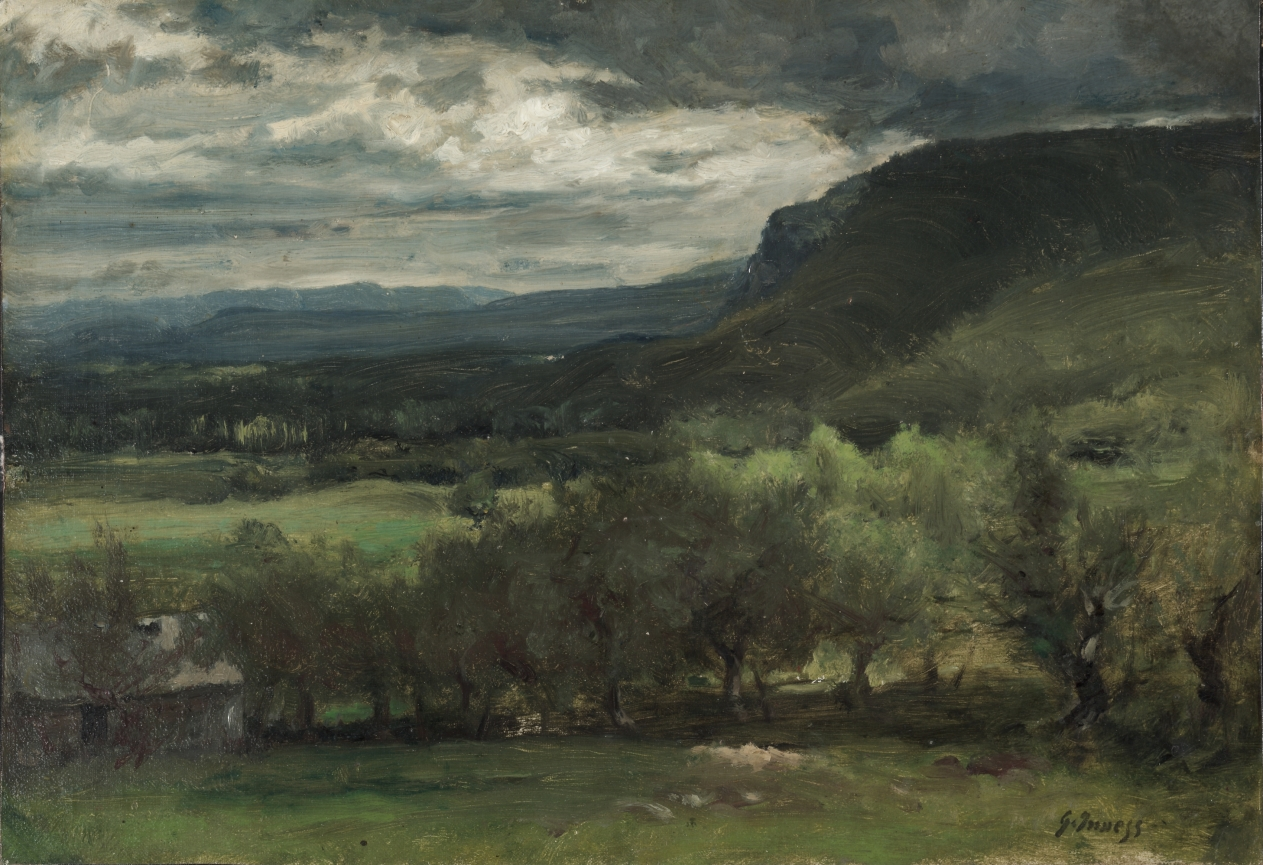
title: Montclair, New Jersey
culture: America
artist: George Inness (American, 1825–1894)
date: c. 1878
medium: oil on canvas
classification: Painting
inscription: Signed lower right: "G. Inness"